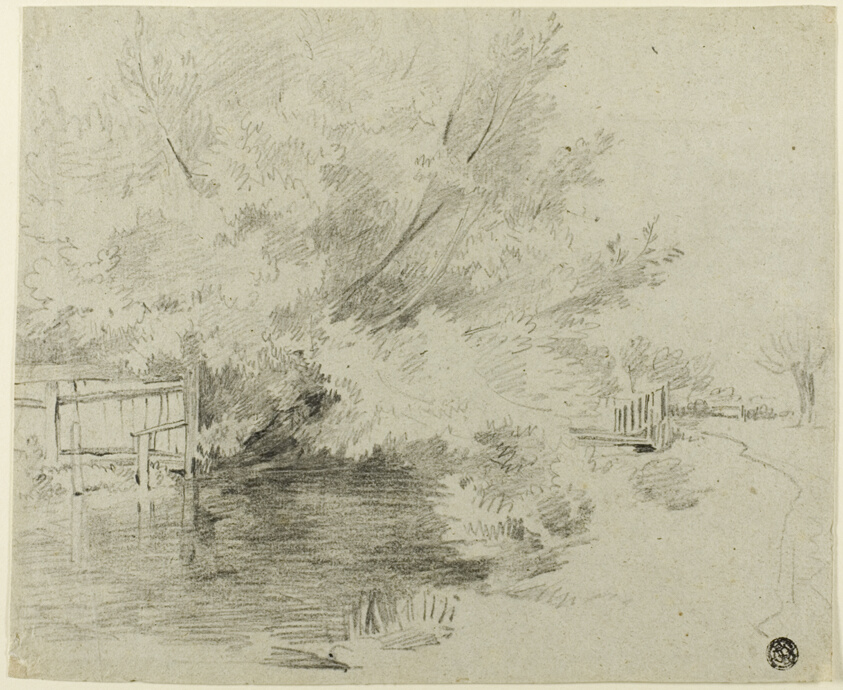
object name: Drawing and Watercolor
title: On the Mole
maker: Attributed to William Henry Hunt; English, 1790-1864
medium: Black crayon on gray wove paper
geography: England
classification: crayon; drawings (visual works); prints and drawing